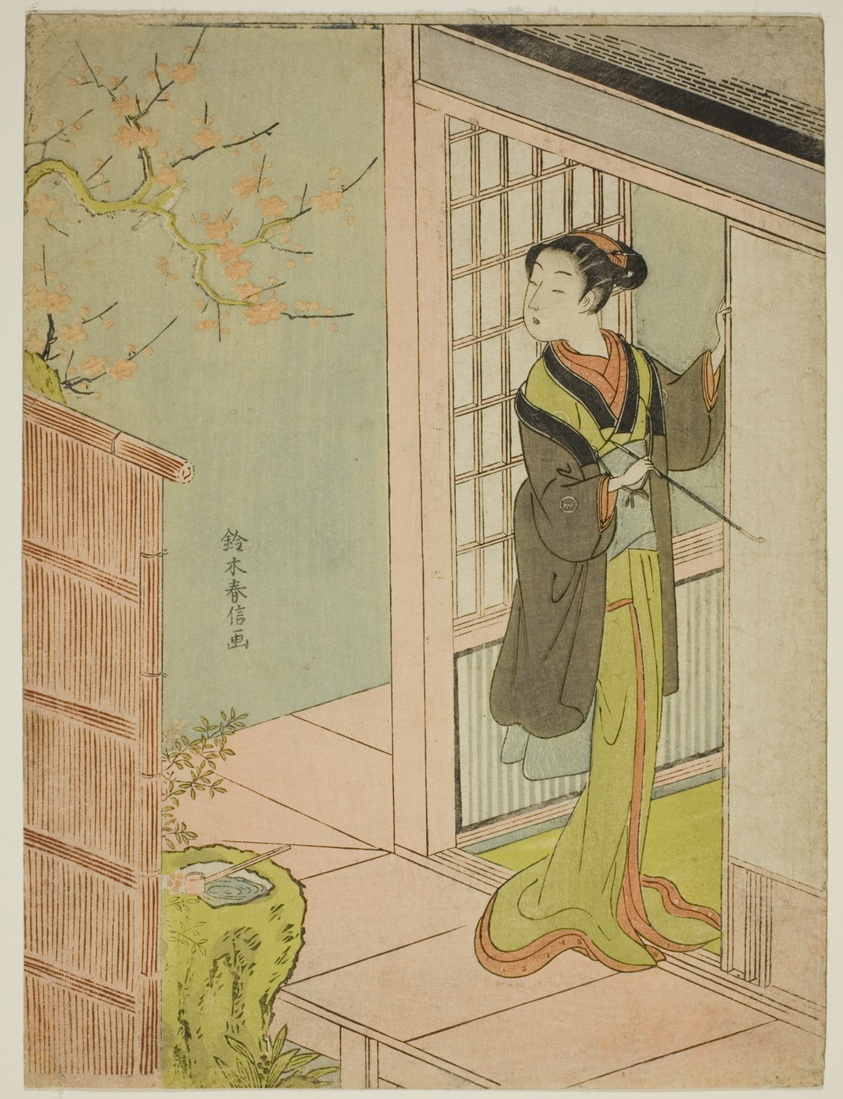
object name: Print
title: Beauty Admiring a Bush Warbler Singing in a Plum Tree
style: Japanese (culture or style)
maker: Suzuki Harunobu 鈴木 春信; Japanese, 1725 (?)-1770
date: c. 1767/68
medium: Color woodblock print; chuban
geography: Japan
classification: woodblock print; print; asian art